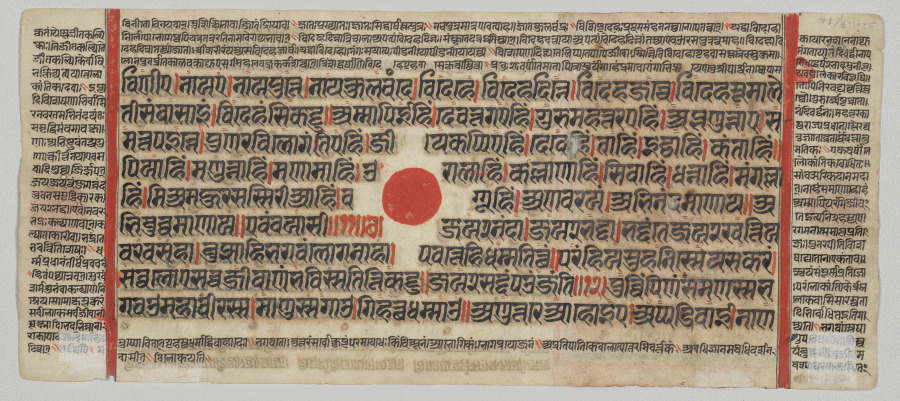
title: Text, Folio 35 (recto), from a Kalpa-sutra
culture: Western India, Gujarat, last quarter of the 15th century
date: c. 1475–1500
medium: Gum tempera, ink, and gold on paper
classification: Painting